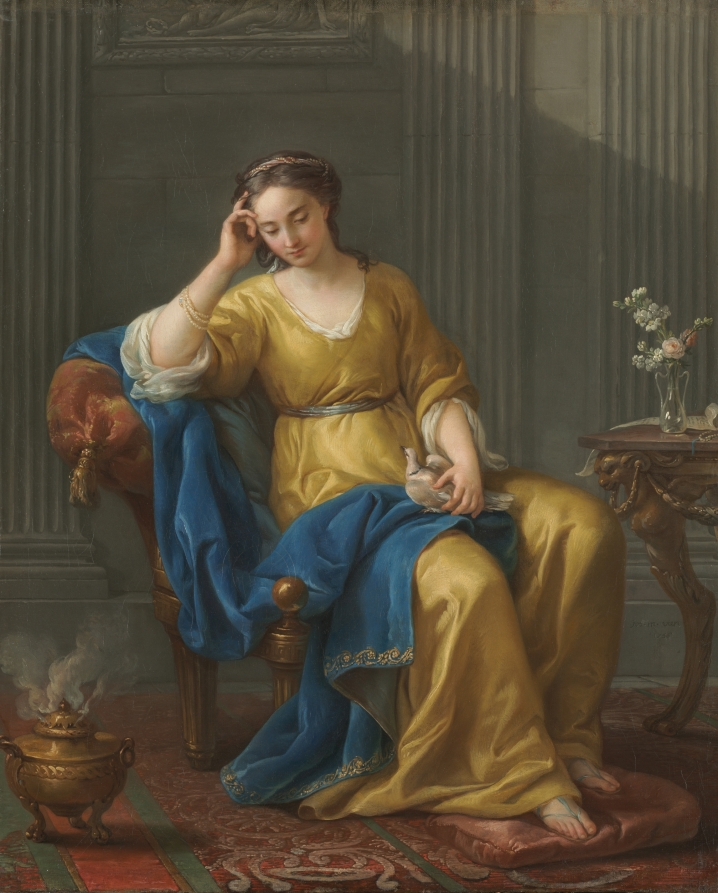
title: Sweet Melancholy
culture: France, 18th century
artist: Joseph-Marie Vien (French, 1716–1809)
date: 1756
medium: oil on canvas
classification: Painting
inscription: Signed lower right: "jos. m. vien / 1756"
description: The chair, brazier, table, and the setting all show Vien's interest in bringing archaeological accuracy to a new level of precision. Yet his delicate handling and graceful palette derive squarely from 18th-century French painting. The gesture of the melancholic figure, with her head on her hand, has roots going back to the Renaissance. Nonetheless, the painting has a wistful rather than tragic tone. Indeed, images of women in interiors, contemplating a letter with longing or sadness, derive from earlier Dutch paintings of daily life, here transformed into an ancient context.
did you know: Look closely—three strands of pearls appear in this painting.